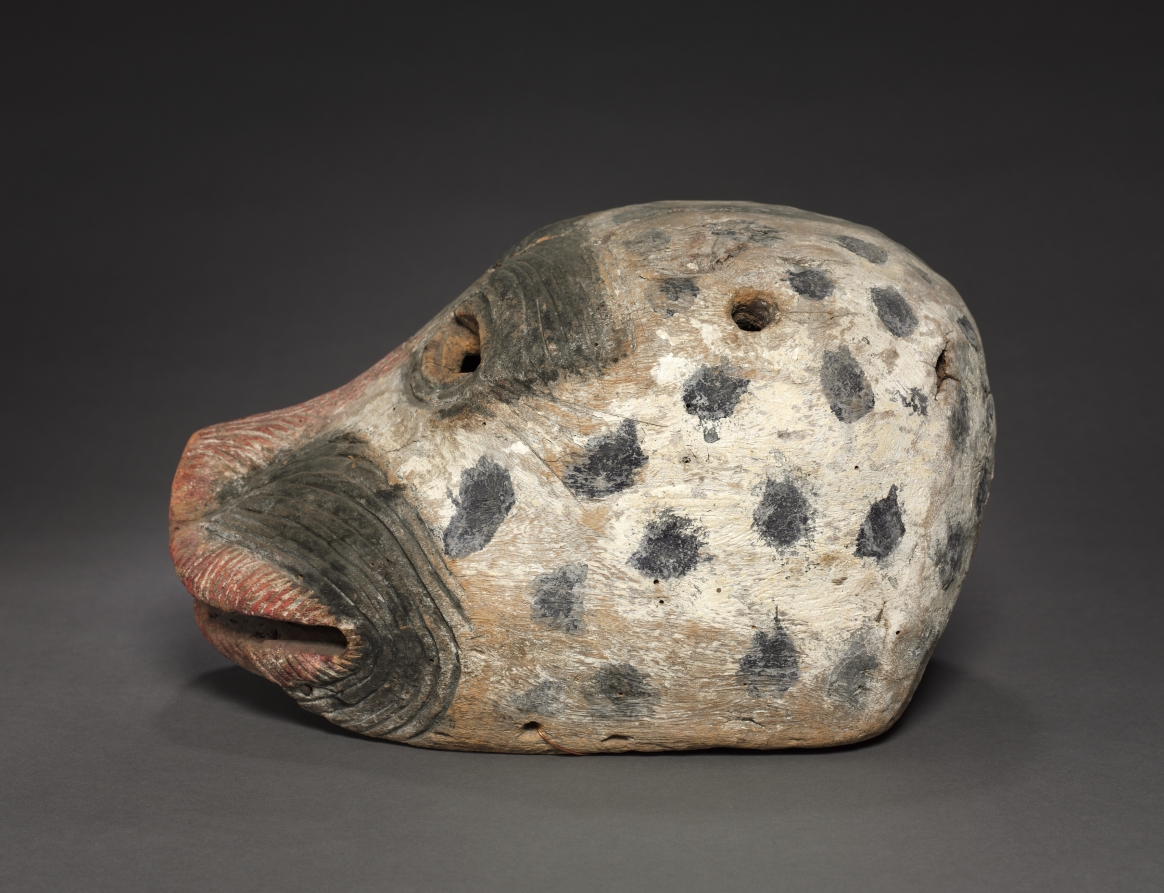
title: Mask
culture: Mexico, Paintla, 19th century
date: 1800s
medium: wood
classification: Sculpture